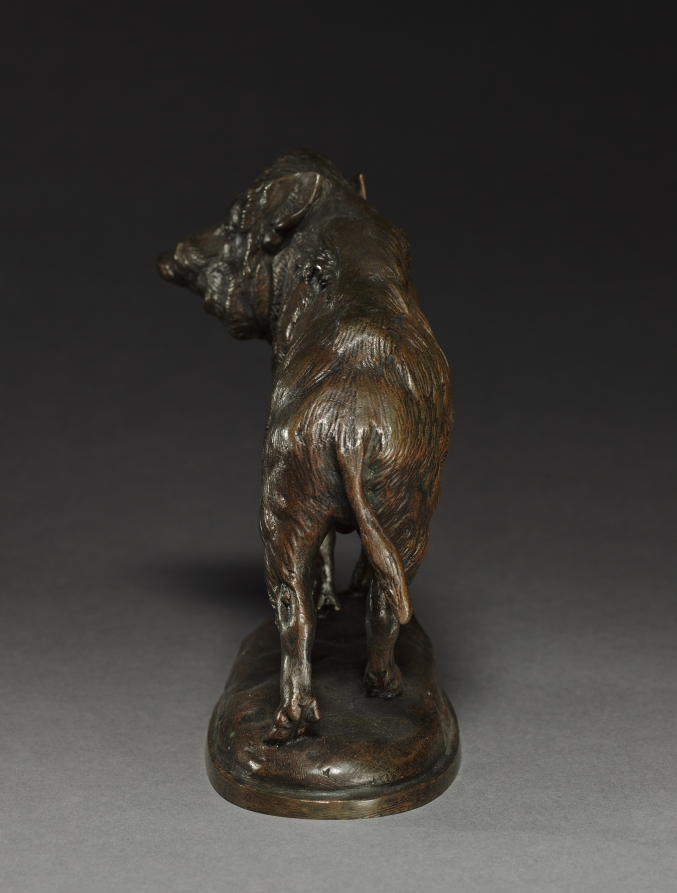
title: Wild Boar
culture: France, 19th century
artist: probably by Antoine-Louis Barye (French, 1796–1875)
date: 19th century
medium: bronze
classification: Sculpture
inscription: Signed" "Barye ALF" (...Foundry(?). On back of base: "C 808", in small letters